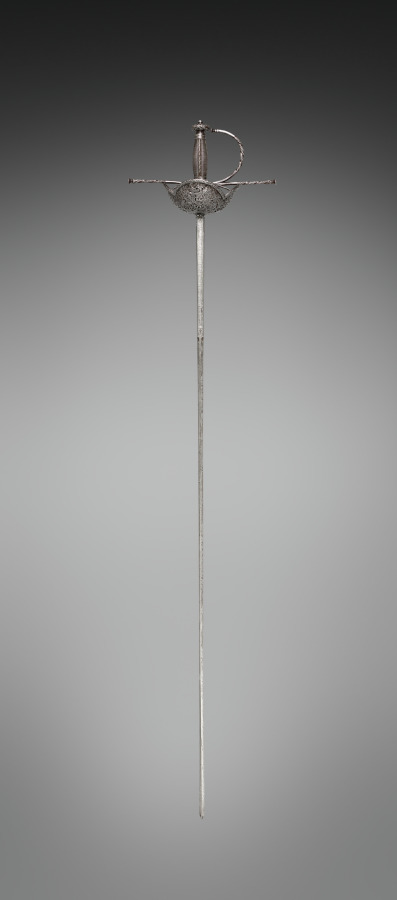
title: Cup-Hilted Rapier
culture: Spain, Toledo, 17th century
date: c. 1650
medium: Pierced and chiseled steel;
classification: Arms and Armor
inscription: PEDRO DEL MONTE/ IN TOLEDO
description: For parrying, rapiers were often made with accompanying daggers as a matched set. The aristocracy's taste for rich and intricate styles of decoration led to extravagant gilding, chiseling, piercing, enameling, and silvering. The more costly or unusual these weapons appeared, the more they were desired by the clientele who commissioned them, not only for dueling but also as the ultimate accessory.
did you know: The guard is richly decorated with chiseled and pierced arabesques, an ornamental design consisting of intertwined flowing lines.